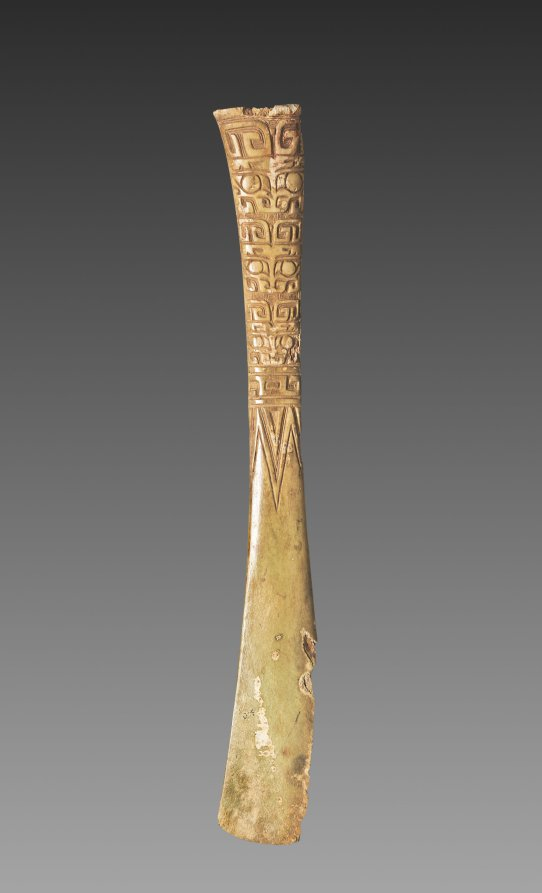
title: Spatula (Si)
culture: China, probably Anyang, Henan province, Shang dynasty (c. 1600–c. 1046 BCE)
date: 1300–1100 BCE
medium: bone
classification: Miscellaneous